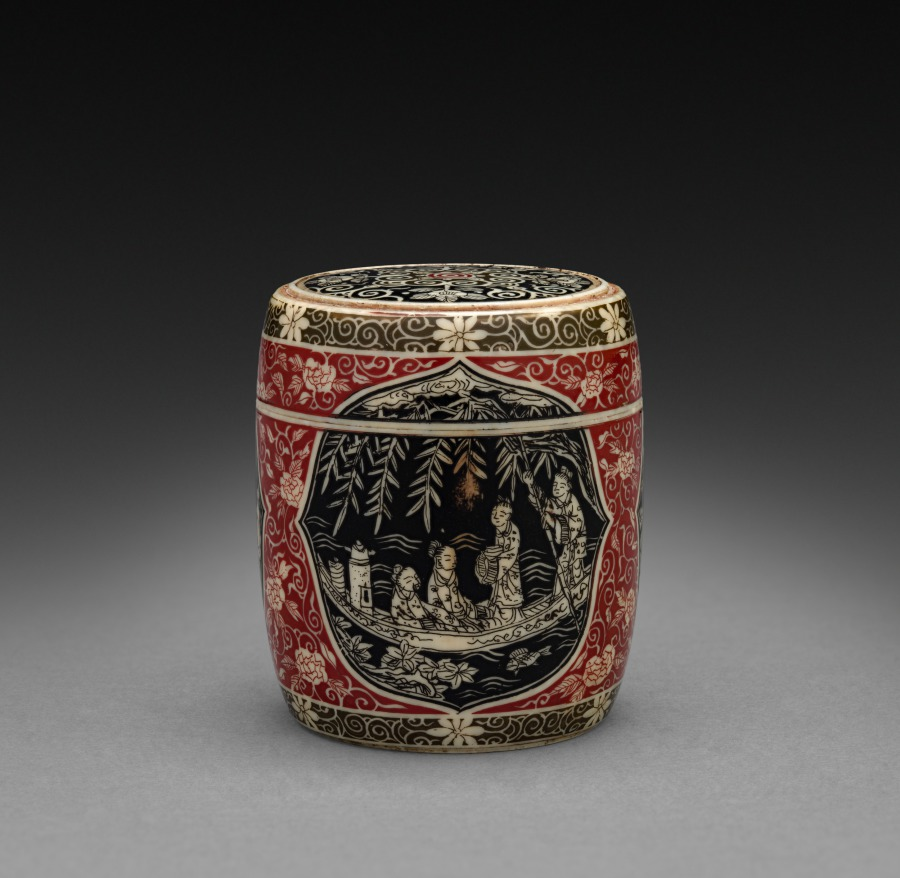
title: Miniature Garden Seat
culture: China, Qing dynasty (1644-1911), Qianlong mark and reign (1736-95)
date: late 1700s–early 1800s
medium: ivory with pigments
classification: Ivory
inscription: 乾隆貢器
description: In the Qing dynasty (1644–1911), luxury items became more affordable to larger parts of the society, including women, merchants, and literati in non-official positions. Imperial patronage and a growing urban population encouraged consumption of luxury goods and local craftmanship. This ivory carved and painted to resemble a miniature garden seat illustrates the superb skills and the creative mind of the talented artisans who sought clients on a competitive market.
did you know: A servant carrying a qin, zither, accompanies two gentlemen admiring the trees.